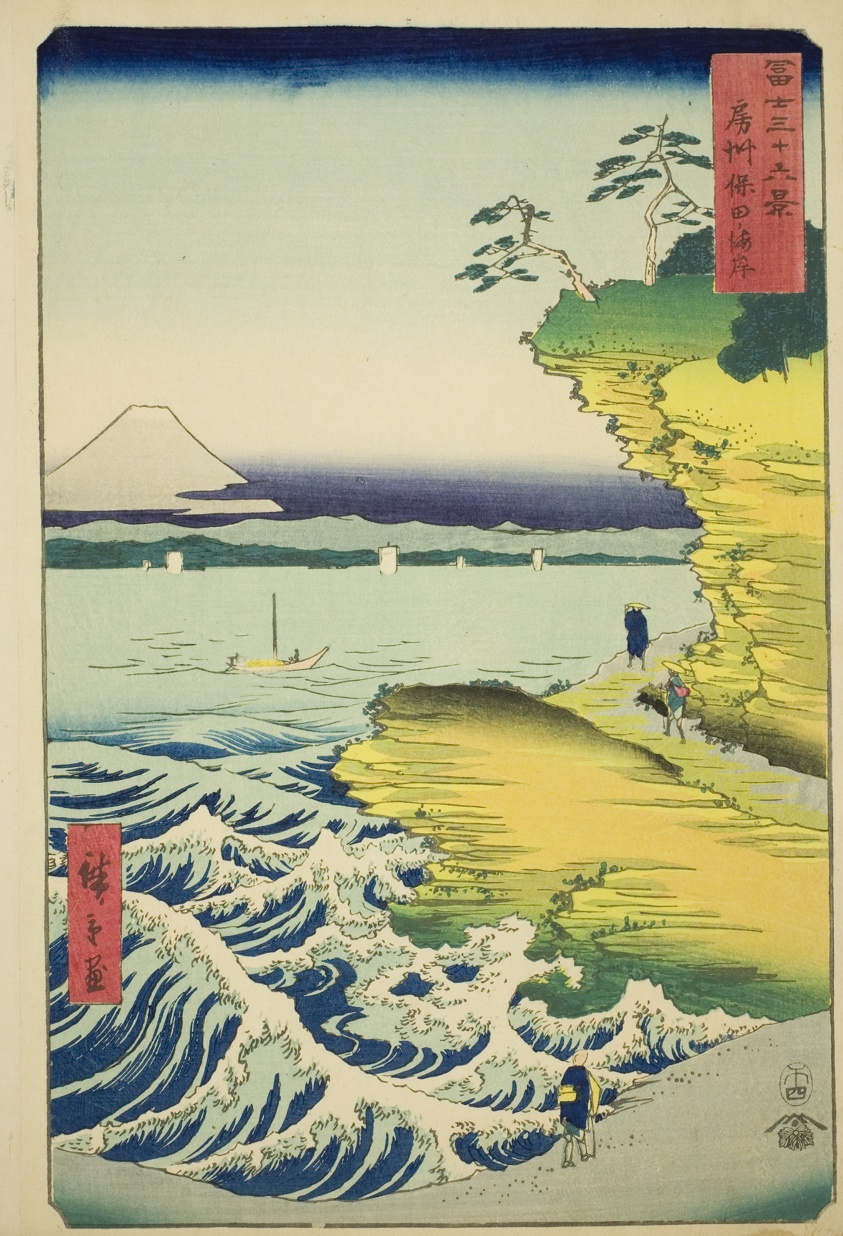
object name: Print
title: Hota Beach in Awa Province (Boshu Hota no kaigan), from the series "Thirty-six Views of Mount Fuji (Fuji sanjurokkei)"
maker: Utagawa Hiroshige 歌川 広重; Japanese, 1797-1858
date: 1858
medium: Color woodblock print; oban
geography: Japan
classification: print; asian art